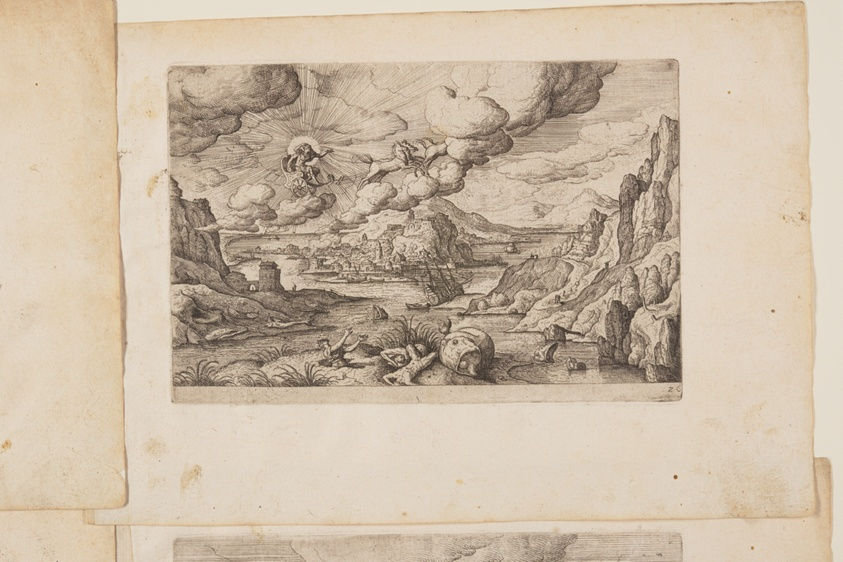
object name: Print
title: Plate 26, from Landscapes with Scenes from the Old and New Testament and Ovid’s Metamorphoses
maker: Hans Bol (Flemish, 1534–1593); published by Philip Galle (Flemish, 1537–1612)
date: 1574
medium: Etching on ivory laid paper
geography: Flanders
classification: print; paper; prints and drawing; etching